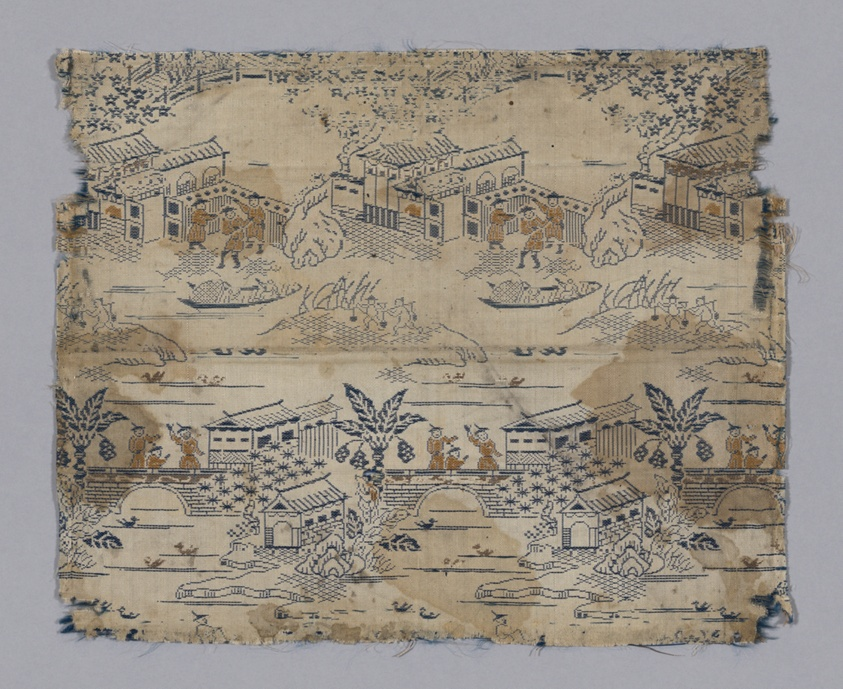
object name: Textile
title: Fragment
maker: Japan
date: late Edo period (1789–1868), 1800/25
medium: Single plain compound cloth, silk & gilt? paper; 2 1/2 strips to m.m.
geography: Japan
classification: weaving; textile